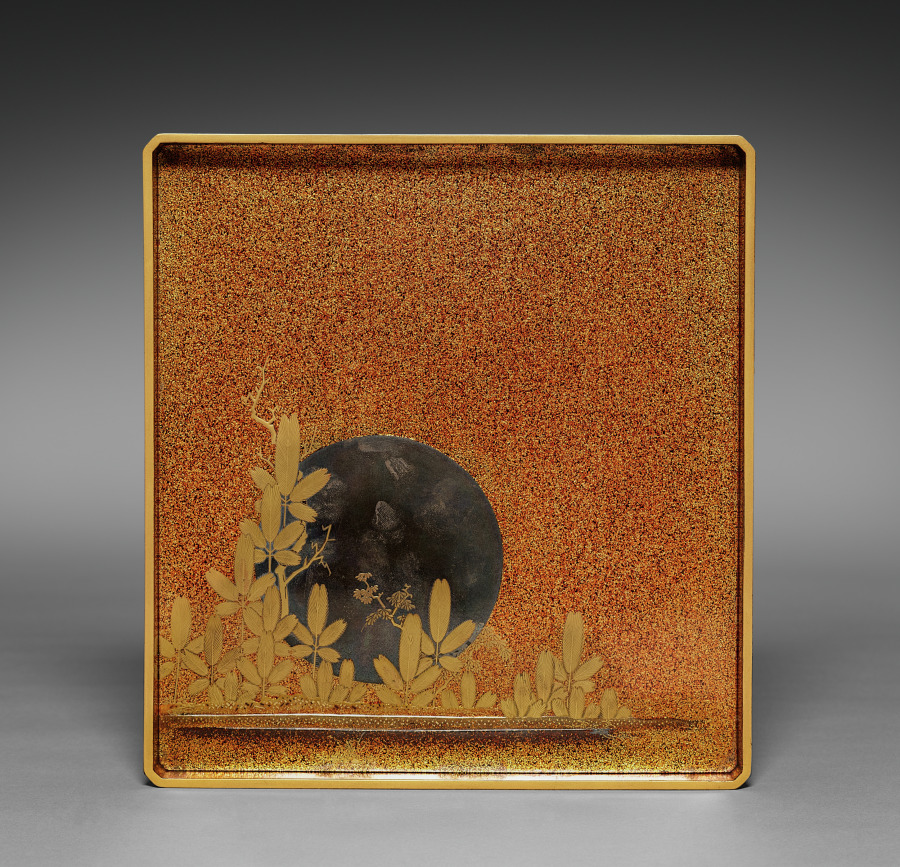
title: Writing Box with Spitting Courtesan (lid)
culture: Japan, Edo period (1615–1868)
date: early to mid-1800s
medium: Lacquered wood with maki-e (image made of sprinkled gold dust)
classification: Lacquer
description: The design on this writing box shows a courtesan who has just completed an impressive feat of spitting the term shinobukoi (忍恋), which could be translated as “hidden love” or “unrequited love,” on an earthen wall. The phrase appeared in classical Japanese poetry anthologies produced by nobles writing in ink on the finest decorated papers. Here, the confining walls of the brothel district become a space for public announcement in graffiti, with the medium being perhaps tea.